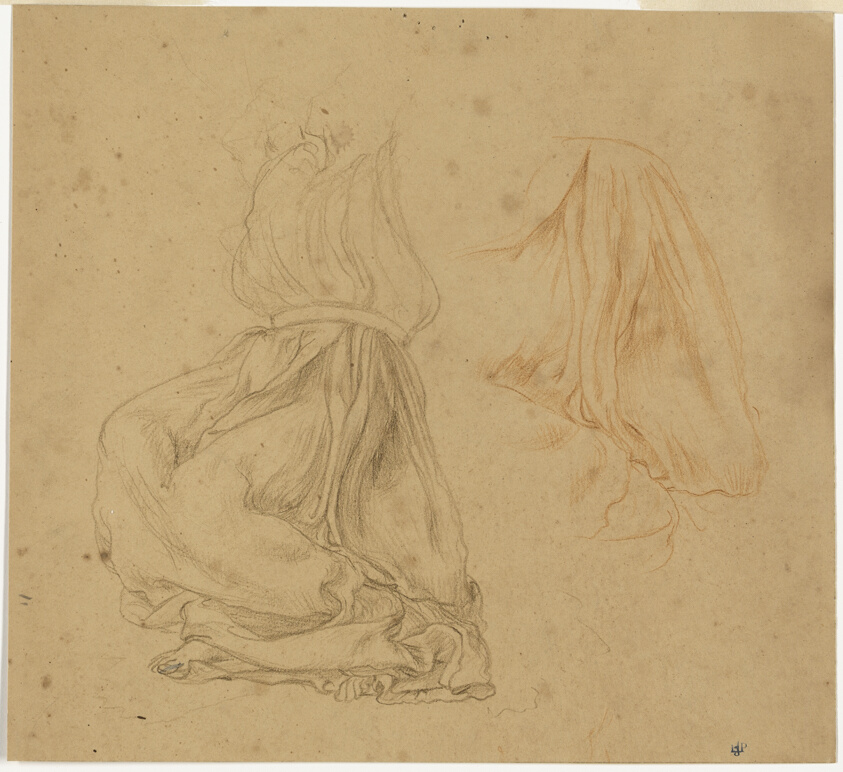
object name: Drawing and Watercolor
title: Study for Festival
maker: Sir Edward John Poynter; English, 1836-1919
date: c. 1875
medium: Brown and red chalks on buff wove paper, hinged to cream wove paper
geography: England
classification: drawings (visual works); prints and drawing